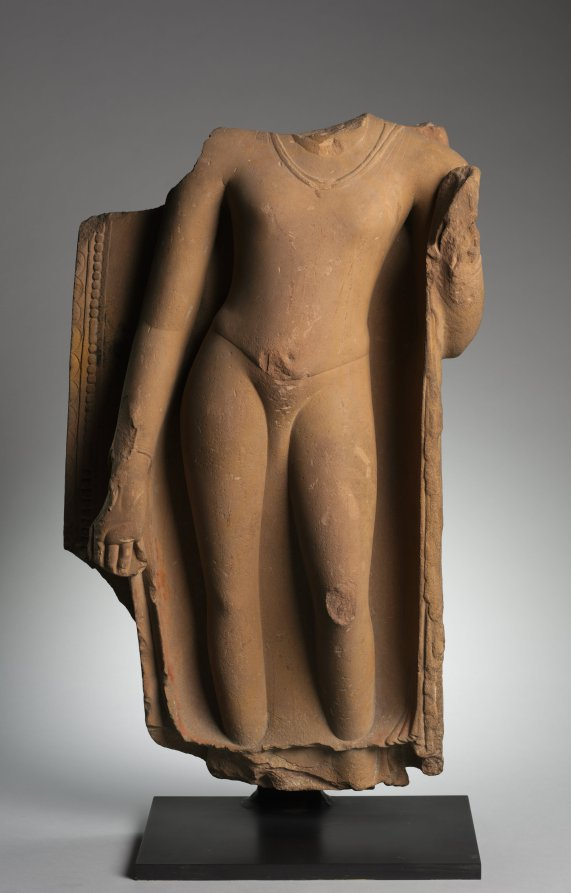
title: Standing Buddha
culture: Northern India, Uttar Pradesh, Sarnath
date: 400s CE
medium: sandstone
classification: Sculpture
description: Depicting the Buddha in a plain robe that clings to the body, without interrupting the beauty of its contours, was a new development in the sculptural workshops of Sarnath during the 400s CE. Sarnath is located near the ancient city of Varanasi on the banks of the Ganges River and is identified as the place where the Buddha gave his first teaching. This form spread by means of portable images to peninsular Southeast Asia.